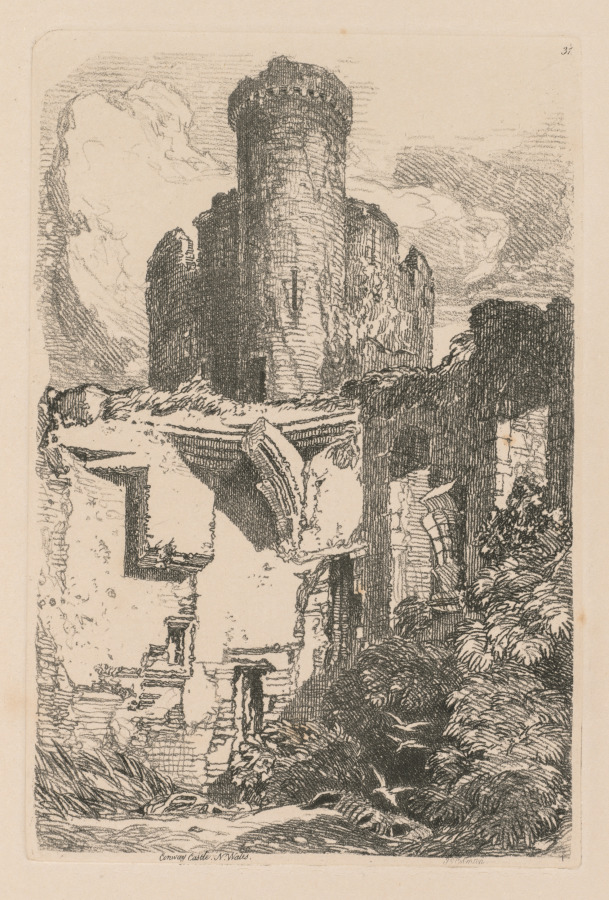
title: Liber Studiorum: Plate 31, Conway Castle, N. Wales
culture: England, 19th century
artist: John Sell Cotman (British, 1782–1842)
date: 1838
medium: softground etching, from a bound volume containing 48 plates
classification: Bound Volume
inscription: In plate, within image, upper right: 31; in plate, below image: Conway Castle, N Wales